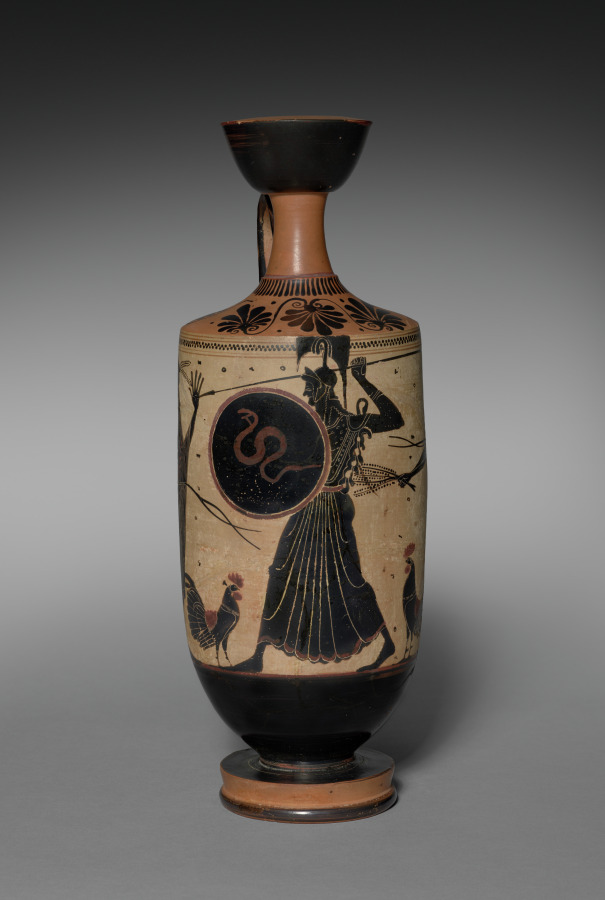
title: Black-Figure White-Ground Lekythos (Oil Vessel): Athena between Cocks and Hieropoioi (Officials)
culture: Greek, Attic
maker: attributed to Athena Painter (Greek, c. 500–475 BCE)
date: 500–485 BCE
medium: Ceramic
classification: Ceramic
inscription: IEPOS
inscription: NOLO and UON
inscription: O.EROIPOS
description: The helmeted war goddess Athena strides forward on this oil vessel, raising her spear and a round shield emblazoned with a red snake. Flanked by two cocks, her pose recalls that on Panathenaic prize vases, the large black-figure amphorae awarded to athletic and equestrian victors in the Panathenaic Games. Beside the roosters stand two bearded, wreathed men, each holding a forked stick. Inscriptions identify the men as hieropoioi (doers of sacred things), officials charged with administration of sacred ceremonies and contests.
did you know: Athena’s skin, typically painted white on black-figure vases, here remains black atop the white ground.